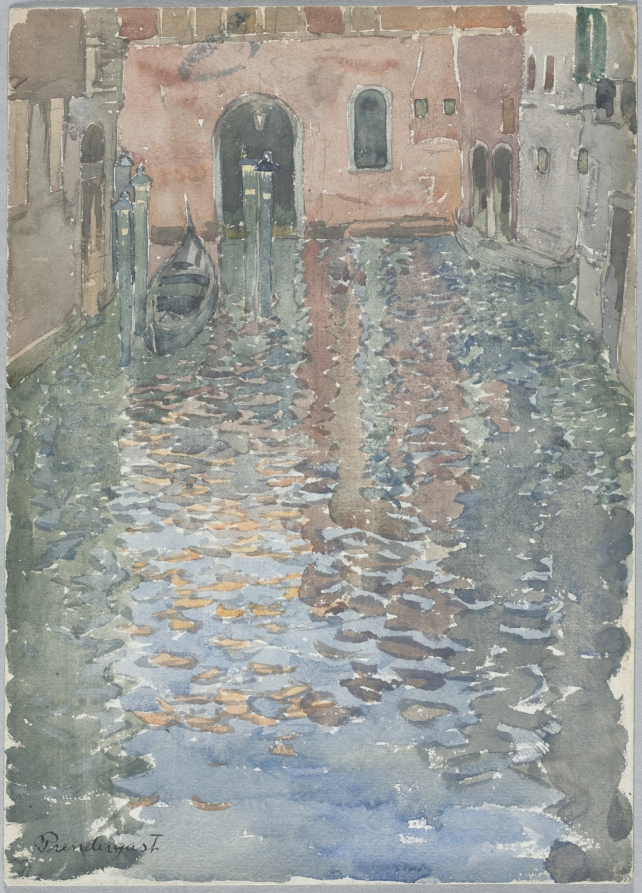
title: Venetian Canals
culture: America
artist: Maurice Prendergast (American, born Newfoundland [now Canada], 1858–1924)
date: c. 1898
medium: watercolor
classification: Drawing